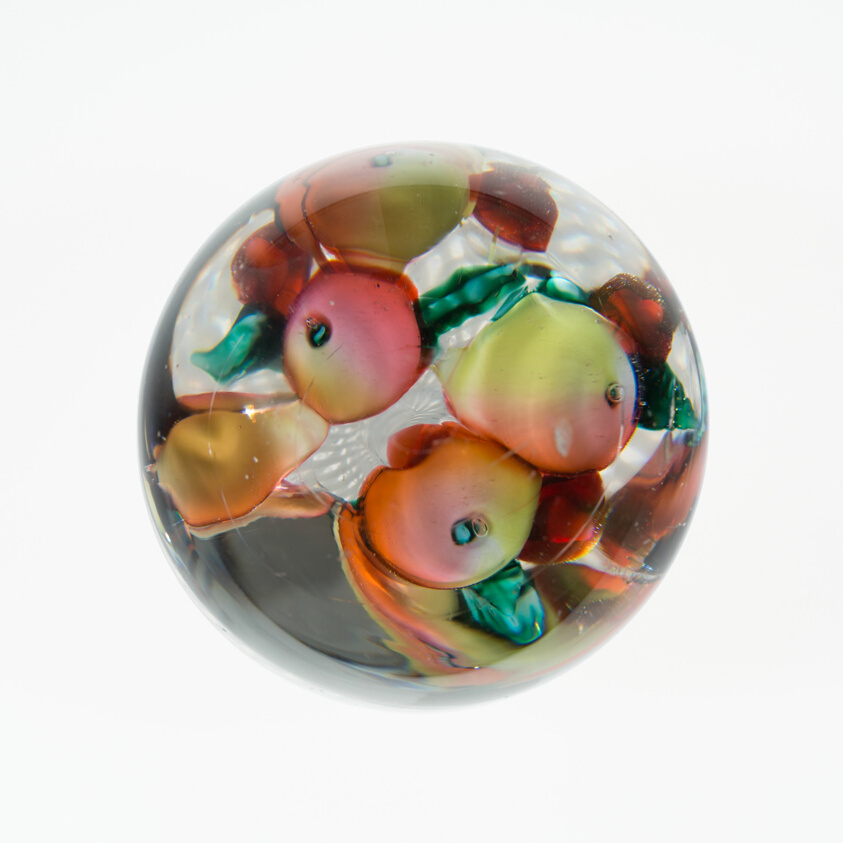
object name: Glass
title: Paperweight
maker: New England Glass Company (Cambridge, Massachusetts, 1818-1888)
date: 1845/70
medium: Glass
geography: Cambridge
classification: paperweight; lampwork; european decorative arts; glass